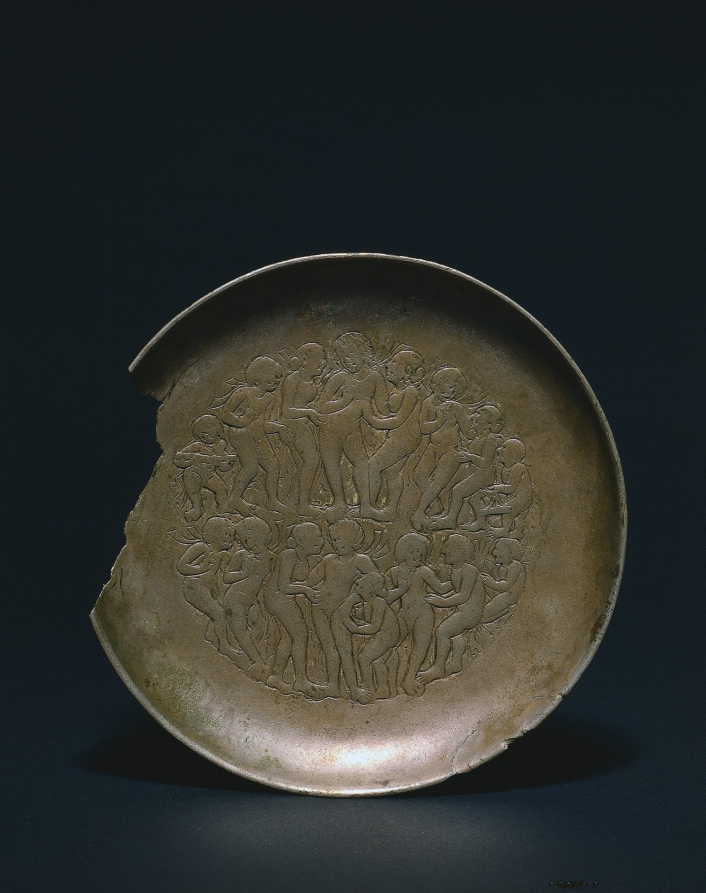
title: Plate with a Scene of Revelry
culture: Northwestern India, possibly Tanesara Mahadeva, Gupta period (320-647)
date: 400s CE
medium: silver with alloy of tin and lead with traces of gilding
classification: Metalwork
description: This rare example of a silver plate from the Gupta period in India depicts the celebration of a spring festival. Figures made during this period are characterized by smooth and rounded body contours and short hairstyles with rows of curls. Though crowded, the masterful composition appears harmoniously unified in its two-tiered circular arrangement of figures.